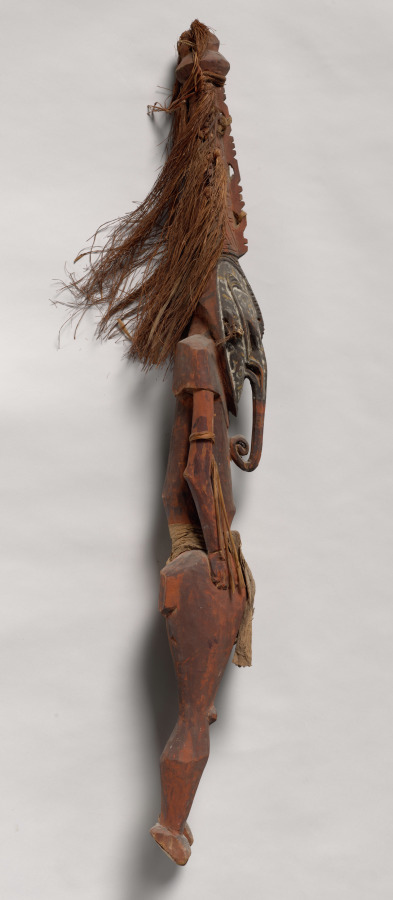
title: Ancestral Figure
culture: Melanesia, Papua New Guinea, Sepik River region, 19th century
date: 1800s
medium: painted wood with fiber and tapa cloth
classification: Sculpture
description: In the Sepik River region, village social and ceremonial life centers on the men's house. Ritual objects such as slit gongs, orators' stools, and flutes are stored there; the most sacred objects are kept hidden from women and children. Carved wooden figures, which probably represent ancestors, were preserved in the men's houses.